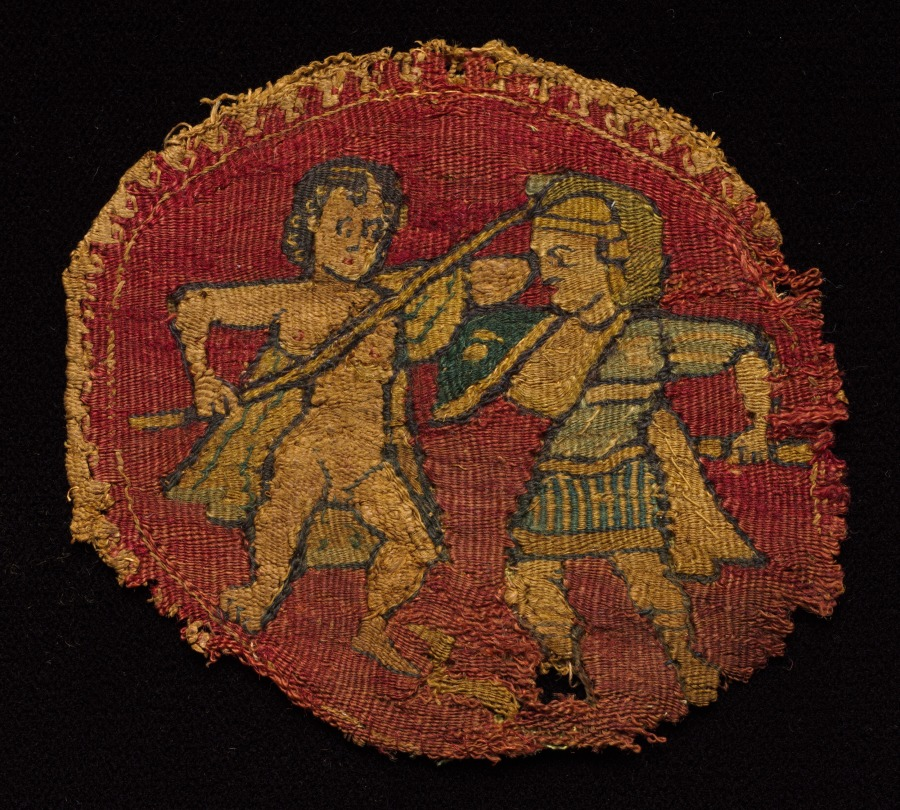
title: Four Segmenta from a Tunic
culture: Egypt, Umayyad period (661–750)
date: 650 – 750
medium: tapestry weave; wool and linen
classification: Textile